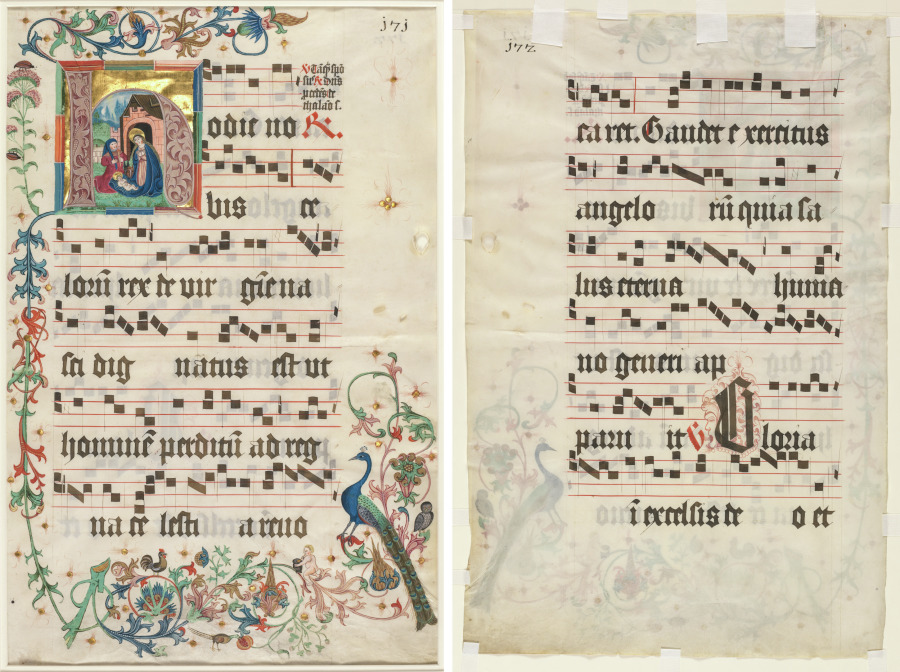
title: Leaf from an Antiphonary: Initial H with the Nativity (recto) and Text (verso)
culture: South Germany, Augsburg (?), 15th century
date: c. 1480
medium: ink, tempera and gold on vellum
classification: Manuscript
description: The border ornament and initial design of this leaf have stylistic affinities with South German illumination of the late 1400s and particularly with the Augsburg workshops. It survives along with two known sister leaves with textual and illustrative references to Saint Clare. This saint was widely venerated during the Middle Ages and is closely associated with Saint Francis who installed her with a group of nuns in a community at Assisi. Francis prescribed an austere way of life for the nuns who afterward became known as the Poor Clares. Saint Clare died in 1253 and was canonized in 1255. The prominent references to Clare in the parent codex to which this leaf belongs implies that it was made for a religious community of that order, perhaps in Augsburg or elsewhere in South Germany. The text reads: Hodie nobis celorum rex (On this day the king of heaven). This is the first matins response for Christmas Day.